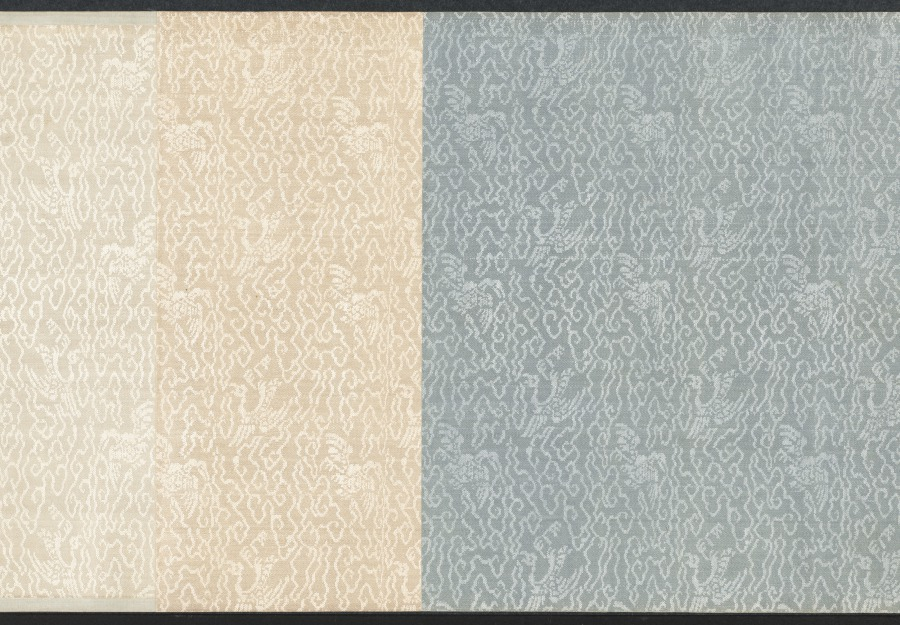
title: Nine Songs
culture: China, Yuan dynasty (1271-1368)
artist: Zhang Wo (Chinese, active c.1336–after 1364)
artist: Chu Huan (Chinese, active 1361)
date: 1361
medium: handscroll; ink on paper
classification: Painting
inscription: 7 colophons and 47 seals: 1 colophon, dated 1361, and 28 seals of Chu Huan 褚奐 (active c. 1361); 1 colophon, dated 1785, and 1 seal of Lu Shihua 陸時化 (1714-1779); 2 seals of Lu Yü-ch'ing (18th c.); 1 colophon, dated 1935, of Ye Gongchuo 葉恭綽 (1881-1968); 1 colophon, dated 1935, of Wu Hufan 吳湖帆(1894–1968); 1 colophon, dated 1938, and 1 seal of Wang Tongyu 王同愈 (1856-1941); 1 colophon, dated 1941, of Wu Huayuan 吳華源 (1893-1972); 1 colophon, dated 1942, and 9 seals of Xu Bangda 徐邦達 (1911–2012); 1 colophon, dated 1942, of Lang Jingshan 郎靜山 (1892-1995); 1 colophon, dated 1944, of Tang Yun 唐雲 (1910-1993); 6 seals of Wang Jiqian [C.C. Wang] 王季遷 (1907–2003).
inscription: Text of The Nine Songs written by Chu Huan at the end of each section.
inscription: 右離騷九歌圖，宋龍溟居士李公本，淮南張渥叔厚所畫妙絕當世。家藏請予書其辭目識于左。至正二十一年辛醜三月旦河南褚奐記。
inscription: Colophon by Lu Shihua 陸時化 (1714–1789): This scroll is fortunate to have been handed down from collections of the right people. Now, after 500 years, its condition is as good as when it was painted. I acquired this from Mr. Shen Guiyu [1673-1769], the President of the Board of Rites. The label is in his handwriting when he was 95 years old. I submit that Chu Huan (t. Shiwen) of the Yuan Dynasty was a native of Qiantang. His "seal" and li writings are in the style of Wu Rui. For example, in [Chu Kuei's] Ming ji lu [A list of masterpieces] is recorded the stele commemorating the restoration of the prefectural school of Kun-shan, the text of which was composed by Yang Weizhen in the twenty-first year of Zhizheng [1361]; and the calligraphy as well as the title in li style was by Chu Huan, who was at that time an assistant judge of the prefecture of Haining in the circuit of Hangzhou. Zhang Wo's zi is Shuhou (叔厚). His literary name is Zhen Qisheng (贞期生). According to [Gu Ying's] Yu shan cao tang ya jii, he liked to paint in the bai-miao or the "pure delineation" style after the method of Li Longmian [Li Gonglin 李公麟], which finds no peer among the ancient masters. This is agreed upon [by Pei Ch'iung] in his Qing jiang zhi who praised [Zhang Wo] as being quite learned and well-versed in many branches of the arts, especially figure painting. Recorded by Lu Shihua [The mountain dweller], listening to the pine, in the twelfth month of the yisi year [1785].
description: Painted in the baimiao, or fine-line drawing style, this ancient work demonstrates the literati’s use of abstract calligraphic brushwork for self-expression. The subject of the “Nine Songs”—songs associated with shamanistic rituals in the ancient Chu kingdom—had traditionally provided artists with myths and legends that they could explore and reinterpret in their own works.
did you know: Divided into eleven sections, the scroll contains illustrations by painter Zhang Wu followed by a transcription of the relevant verse by calligrapher Chu Huan.